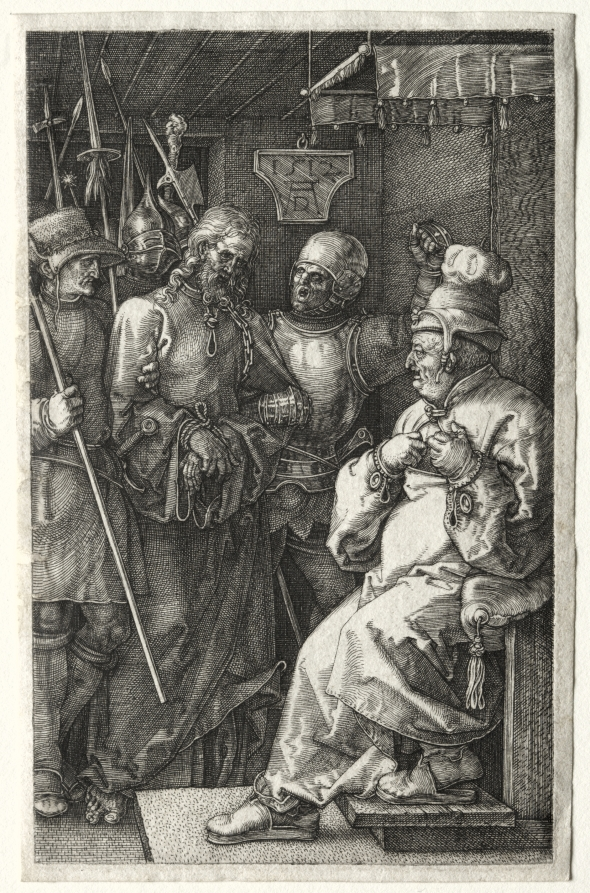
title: Christ before Caiaphas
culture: Germany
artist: Albrecht Dürer (German, 1471–1528)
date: 1512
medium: engraving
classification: Print